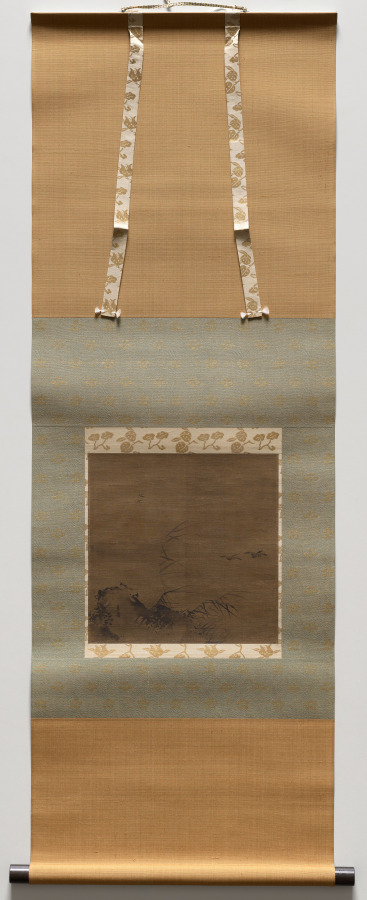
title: Waterfowl and Reeds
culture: China, Southern Song dynasty (1127-1279)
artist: attributed to Liang Kai (Chinese, mid-1100s–early 1200s)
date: early 1200s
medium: Hanging scroll; ink on silk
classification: Painting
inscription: Artist's signature on rock at left.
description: This album leaf now mounted as a hanging scroll is attributed to the 13th-century artist Liang Kai, who served for a time in the Southern Song court as a court painter. In recognition of Liang’s outstanding talent, Emperor Ningzong (reigned 1195–1224) granted him the “Gold Belt,” the highest honor reserved for court painters. The artist, however, left his prestigious position in pursuit of the simple life in Buddhist monasteries. The so-called one-corner composition (leaving empty space on one side as the artist did here) was popular in both the imperial court and Buddhist monasteries. This distinctive composition allowed the artist to render a sense of space. Liang Kai’s abbreviated style and expressive monochromatic brushwork were often understood to embody ideals of Chan (Zen) Buddhism, and were continued by later Buddhist painters.